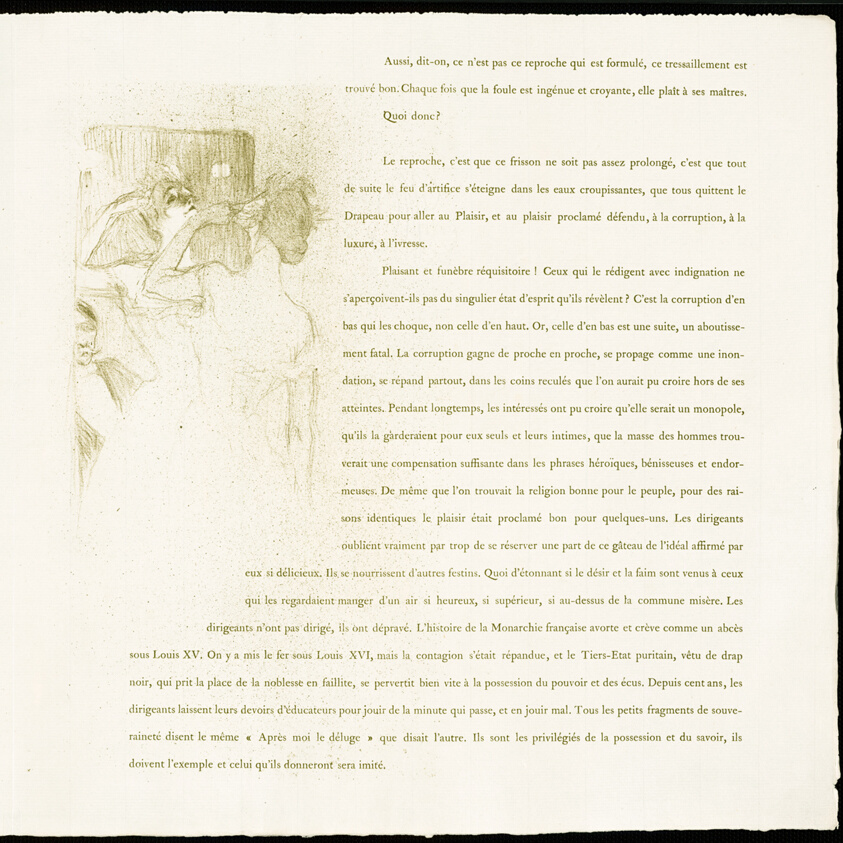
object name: Print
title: Yvette Guilbert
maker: Henri de Toulouse-Lautrec (French, 1864-1901)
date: 1894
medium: Color lithograph, with letterpress, on ivory laid paper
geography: France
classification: lithograph; print; prints and drawing